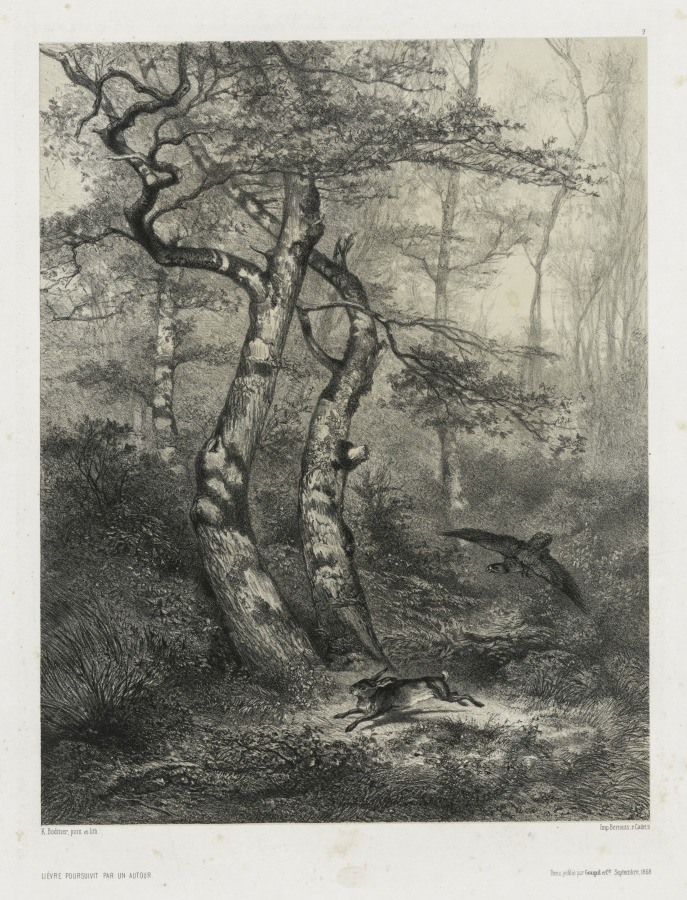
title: Hare Pursued by a Goshawk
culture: Switzerland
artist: Karl Bodmer (Swiss, 1809–1893)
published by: Goupil & Co., Paris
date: 1858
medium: lithograph on chine collé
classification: Print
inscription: In plate, above image, upper right: 7; in plate, lower left: K. Bodmer, pinx et lith.; lower right: Imp. Bertauts.r.Cadet.11.; mid margin, lower left: Lievre Poursuivit Par Un Autour.; lower right: Paris. publie par Goupil et Cie Sept